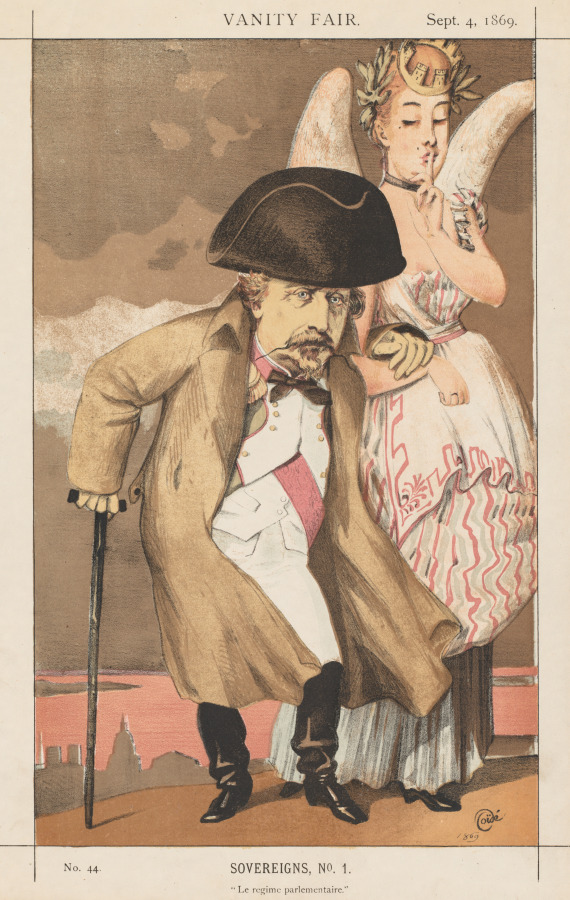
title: Vanity Fair: Sovereigns, No. 1 "Le regime parlementaire"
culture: France, 19th century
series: published in Vanity Fair Sept 4, 1869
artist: James Tissot (French, 1836–1902)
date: 1869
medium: color lithograph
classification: Print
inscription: artist monogram, "Coide" in stone